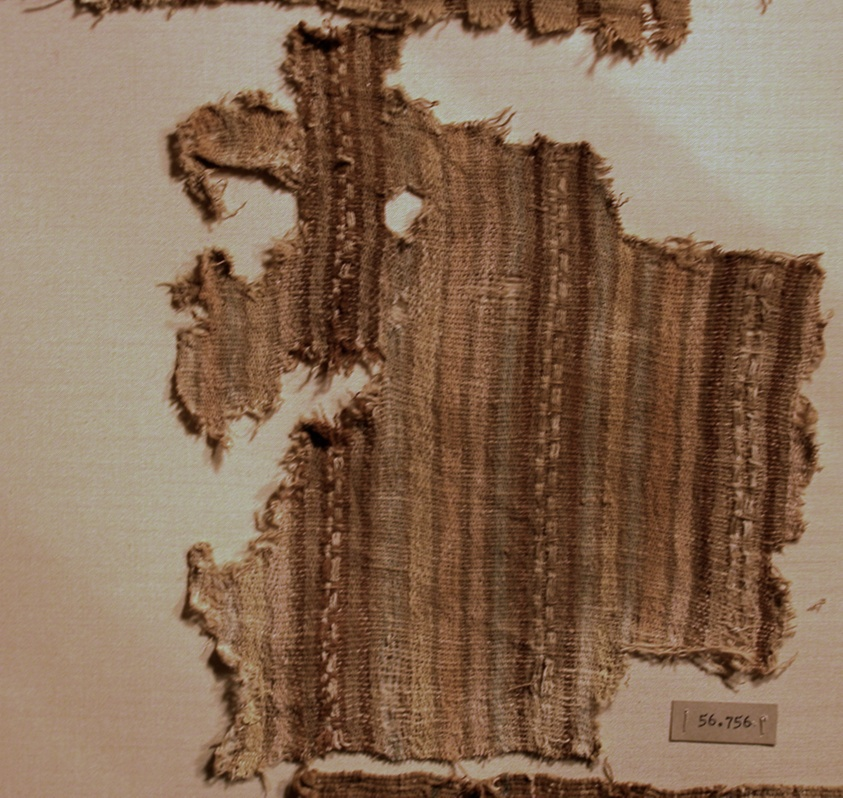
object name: Textile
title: Fragment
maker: Peru, north coast, Culebra Valley, La Capilla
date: A.D. 1000/1476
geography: Peru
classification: textile; weaving